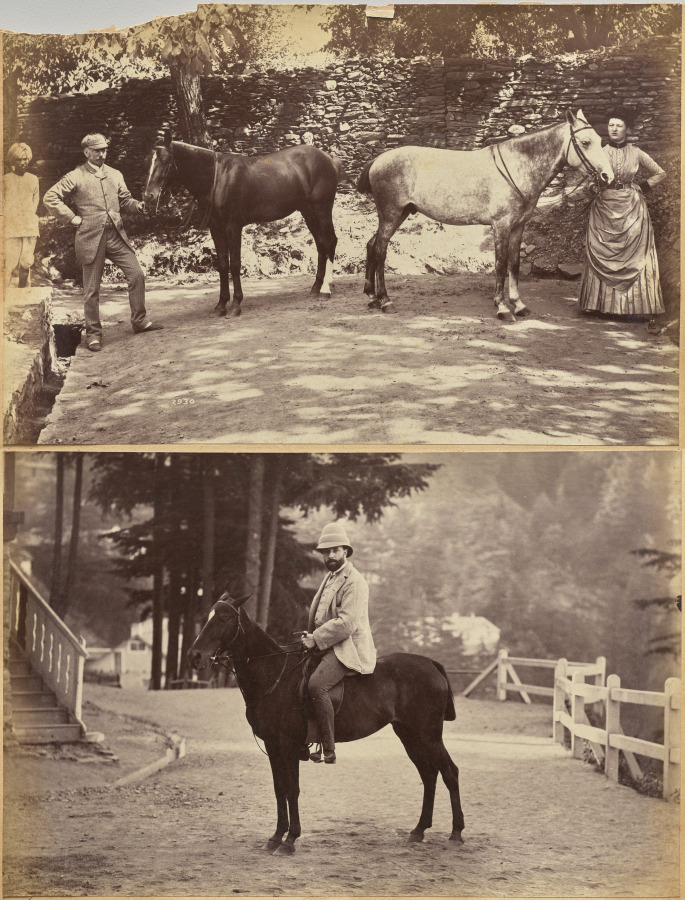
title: Col. F. G. Oldham (recto, top); Mr. Nowell, Shimla (recto, bottom)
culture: India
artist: Raja Deen Dayal (Indian, 1844–1905)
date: c. 1882–87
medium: albumen print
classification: Photograph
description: These photographs are part of an album, now disassembled, of around 105 photographs taken in India between 1885 and summer 1887 that provide glimpses into the lives of the British colonial elite and royal and upper-class Indians. The museum holds another group of 37 pictures from this album (2016.266), which was probably commissioned by a British civil servant visiting or working in India around 1888 as a personal souvenir of his experiences there.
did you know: Raja Deen Dayal is regarded now, and was considered during his lifetime, to be India’s most important 19th-century photographer.